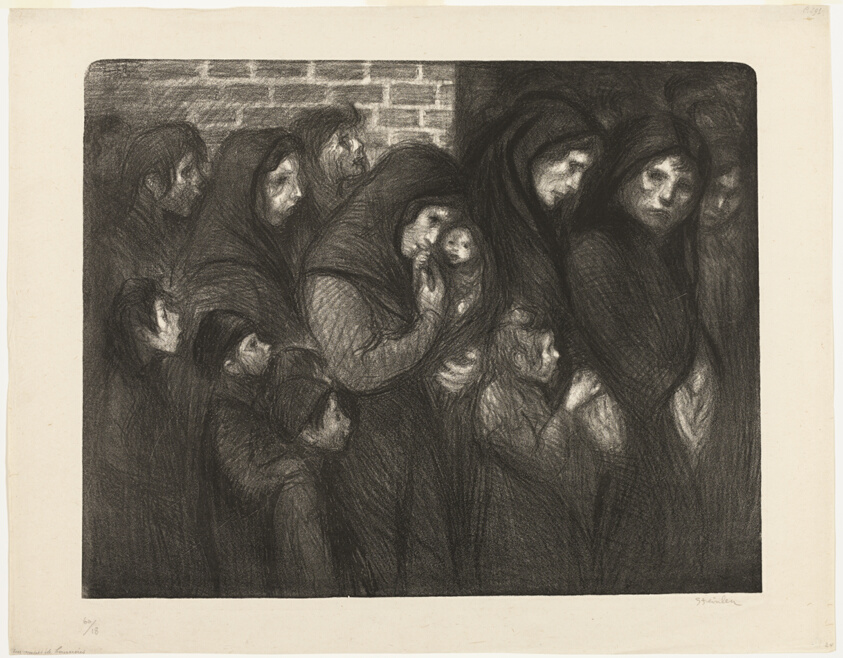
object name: Print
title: The Widows of Courrières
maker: Théophile-Alexandre Steinlen; French, born Switzerland, 1859-1923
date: 1909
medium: Lithograph in black on ivory China paper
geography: France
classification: lithograph; print; prints and drawing